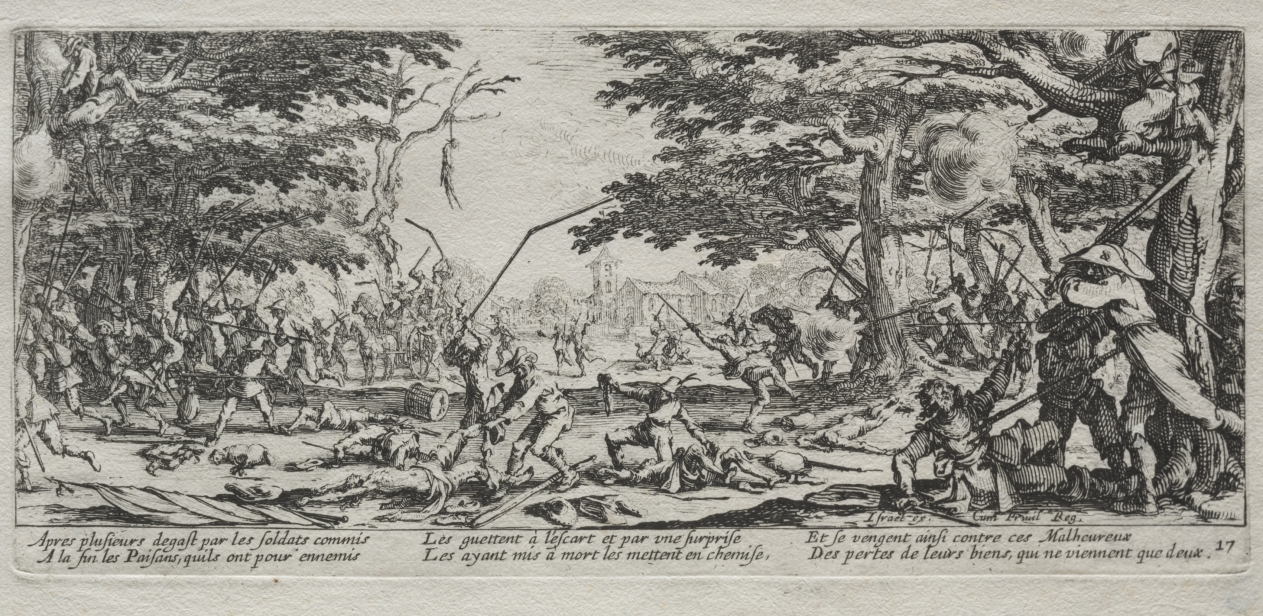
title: The Large Miseries of War: Peasant's Revenge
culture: France, 17th century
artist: Jacques Callot (French, 1592–1635)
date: 1633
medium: etching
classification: Print